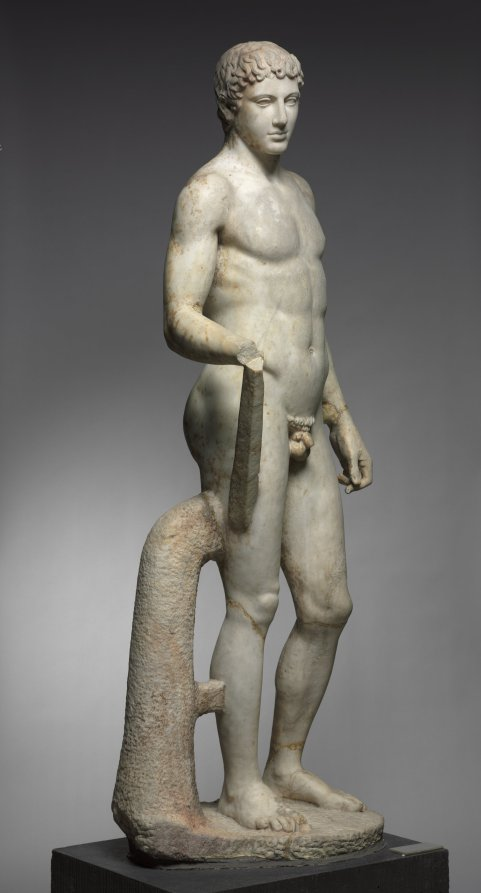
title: Statue of an Athlete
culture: Italy, Roman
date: 1–100 CE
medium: marble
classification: Sculpture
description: This idealized athlete recalls Greek sculptural types invented and popularized during the 400s BC. Large-scale athletes and other sculptures like this were originally created by famous artists as sanctuary dedications. Centuries later, they were widely copied and adapted by Roman sculptors, whose clients sought their own versions of earlier masterpieces. Working in marble rather than bronze, these sculptors added certain elements for stability, such as the struts and the large tree trunk beside the right leg here. Sculptures like this one are profoundly complex, made by and for Romans but descended from Greek ancestors.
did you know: For many years, this sculpture stood in the rotunda of the Cleveland Museum of Art.